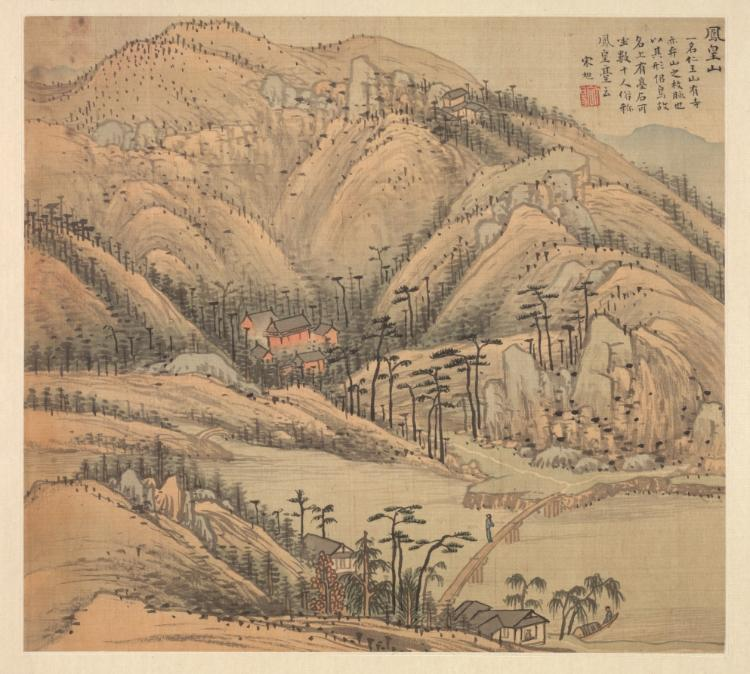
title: Mt. Fenghuang (Mt. Phoenix)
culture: China, Jiaxing, Ming dynasty (1368–1644)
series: Eighteen Views of Huzhou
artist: Song Xu (Chinese, 1525-c. 1606)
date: c. 1588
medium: Album leaf; ink and color on silk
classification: Painting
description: By the 1500s, visits to historic and scenic sites in the lower Yangzi delta stimulated an increase of printed illustrated travel books. Topographical depictions of local scenery flourished. Leaves from this album illustrates sites around Lake Tai of the two adjacent counties Changxing and Wuxing (modern Huzhou). Song Xu, who lived intermittently in Jiaxing and Songjiang, must have passed through Wuxing by boat and thus knew the region. The paintings are inscribed with gazetteerlike notations, suggesting that the album was produced for clients as commemorative works, a travel guide, or for “armchair travel” (woyou) in one’s mind.